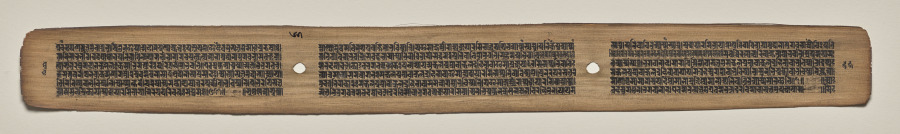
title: Text, Folio 65 (verso), from a Manuscript of the Perfection of Wisdom in Eight Thousand Lines (Ashtasahasrika Prajnaparamita-sutra)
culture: Eastern India, Bihar, Vikramashila Monastery. Painting: Nepal, Kathmandu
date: Sunday, September 14, 1119 (year 239 of the Newar Samvat in the month of Ashvina)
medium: gum tempera and ink on palm leaves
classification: Painting